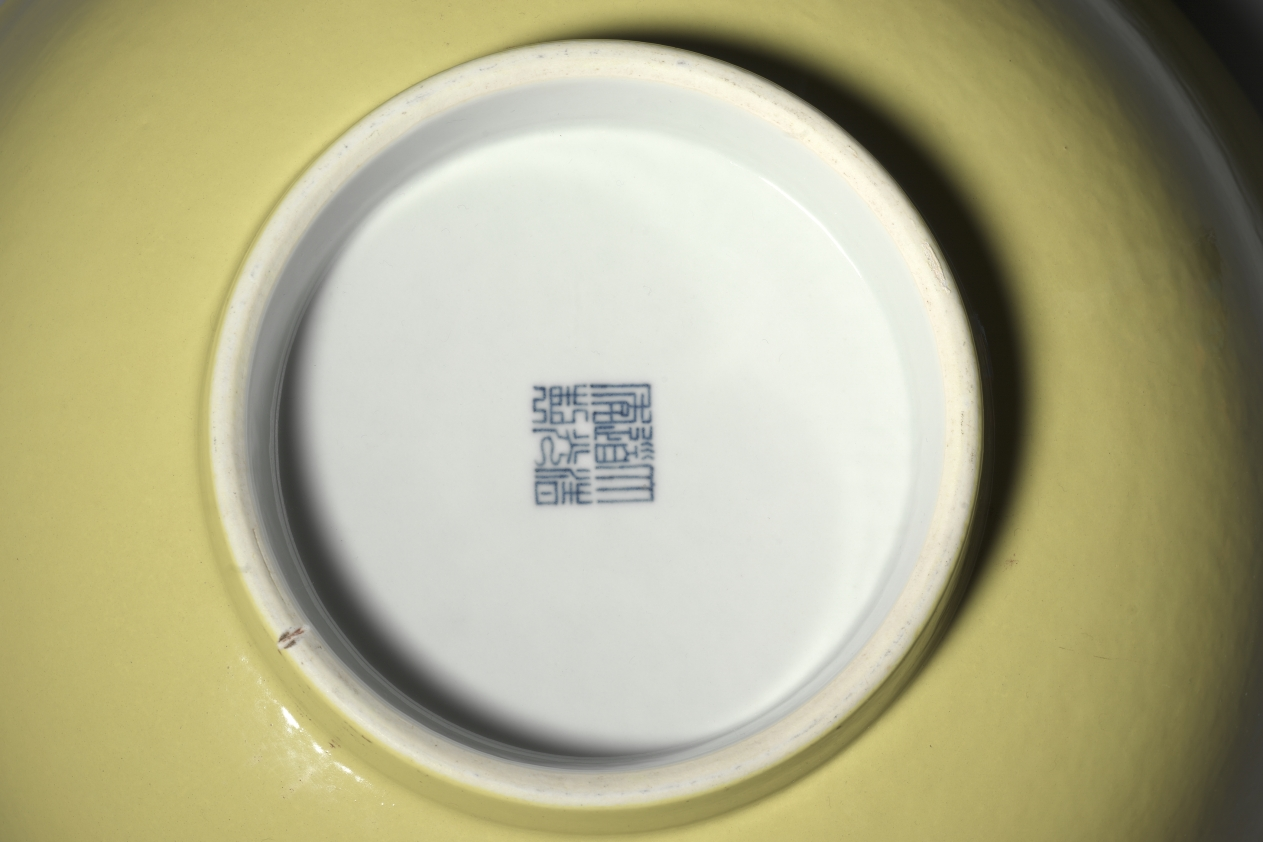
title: Large Bowl with Yellow Enamel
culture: China, Qing dynasty (1644-1911), Daoguang mark and reign (1821-50)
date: 1821–50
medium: enameled porcelain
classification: Ceramic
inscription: 大清道光年制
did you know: This monochromatic yellow dish was made for the imperial household.